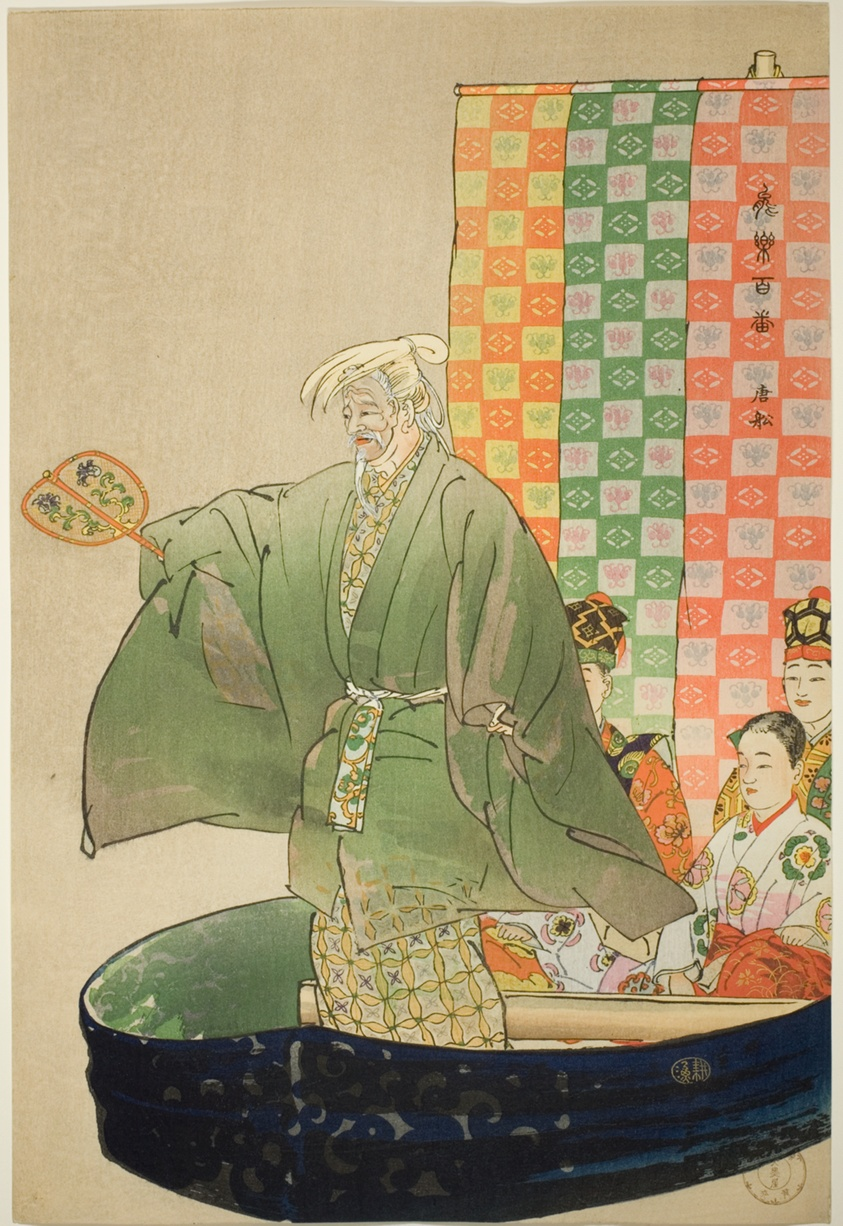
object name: Print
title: To-sen, from the series "One Hundred No Dramas (Nogaku hyakuban)"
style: Japanese (culture or style)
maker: Tsukioka Kogyo; Japanese, 1869-1927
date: 1898/1903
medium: Color woodblock print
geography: Japan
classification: woodblock print; print; asian art